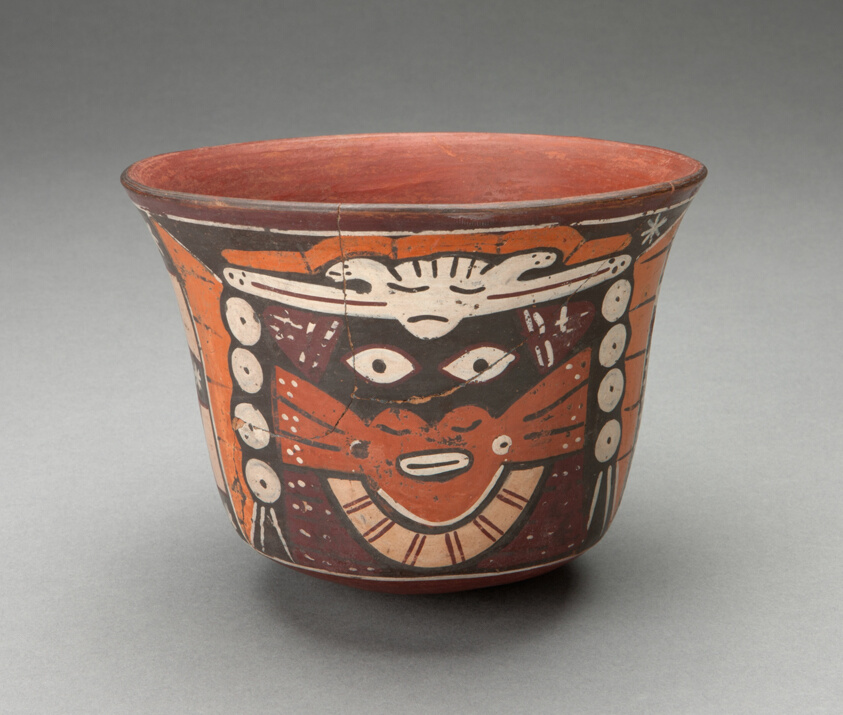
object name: Vessel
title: Bowl Depicting Costumed Ritual Performer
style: nazca, early intermediate period, Pre-Columbian, americas, Arts of the Americas, andean, andes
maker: Nazca; South coast, Peru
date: 180 BCE–500 CE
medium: Ceramic and pigment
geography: Nazca Valley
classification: bowl; earthenware; art of the americas; ceramics; vessel